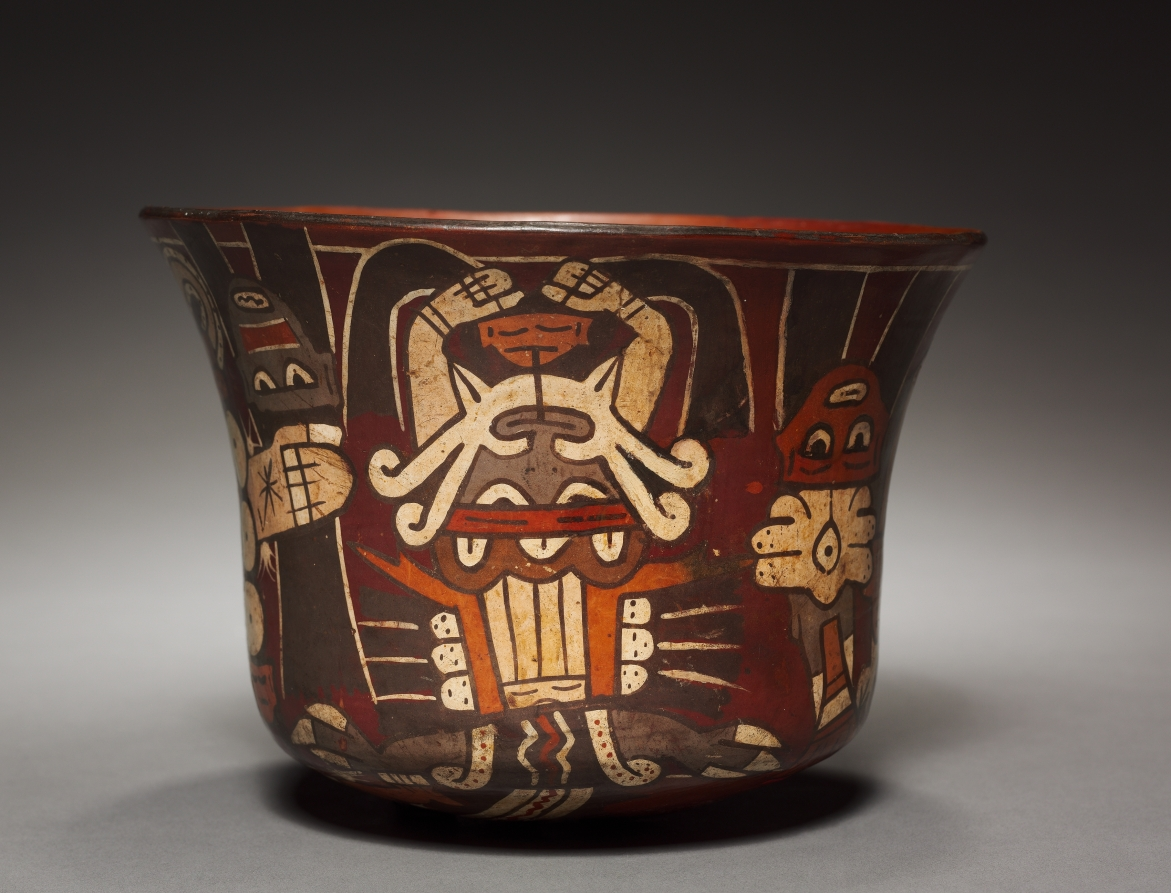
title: Bowl with Costumed Being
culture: Peru, South Coast, Nasca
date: 100 BCE–700 CE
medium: earthenware with colored slips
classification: Ceramic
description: Supernatural figures like the one on this bowl are shown wearing ornaments that actually exist-like the nearby Mouth Mask-they may represent humans clothed as deities who served as living cult images during rituals. The figure holds a severed head that probably alludes to capture of an enemy’s life force, since severed heads and fertility are linked in Nasca art.